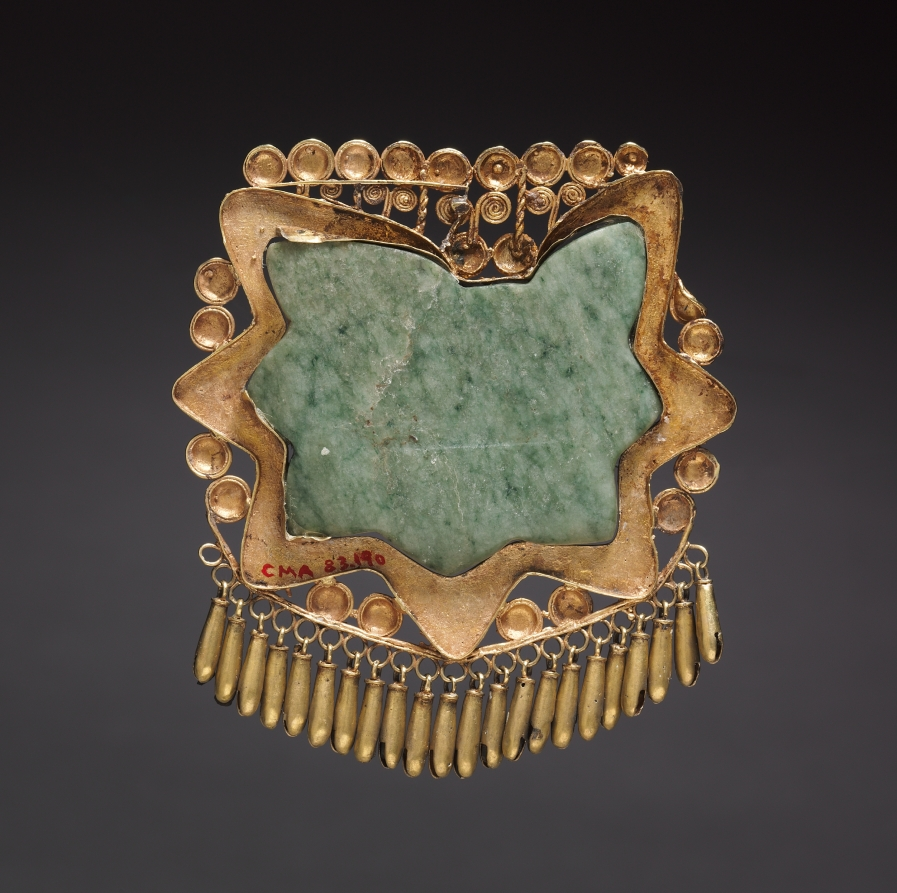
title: Pectoral Ornament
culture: Mexico, Guerrero, Ichcatiopan, Mixtec or Aztec style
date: c. 1200–1519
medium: gold, jadeite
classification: Jewelry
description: This extraordinary pendant consists of a conch shell section carved in jade, enclosed in a delicate gold frame with tiny dangling bells. This symbol was worn by the deity Quetzalcoatl (Feathered Serpent), a culture hero credited in one myth with creating human life by sprinkling his blood on ground bones. The pectoral may have been worn by a priest, or by a ceremonial impersonator of Quetzalcoatl.